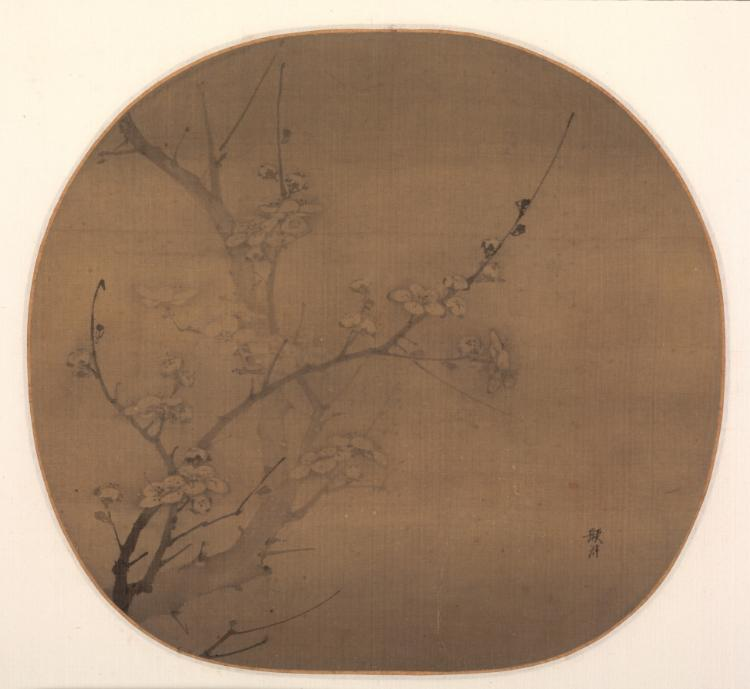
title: Plum Blossoms in Moonlight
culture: China, Yuan dynasty (1271-1368)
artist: Yan Hui (Chinese, active 1270–1310)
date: first half of the 1300s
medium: album leaf, ink on silk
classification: Painting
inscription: 顏輝